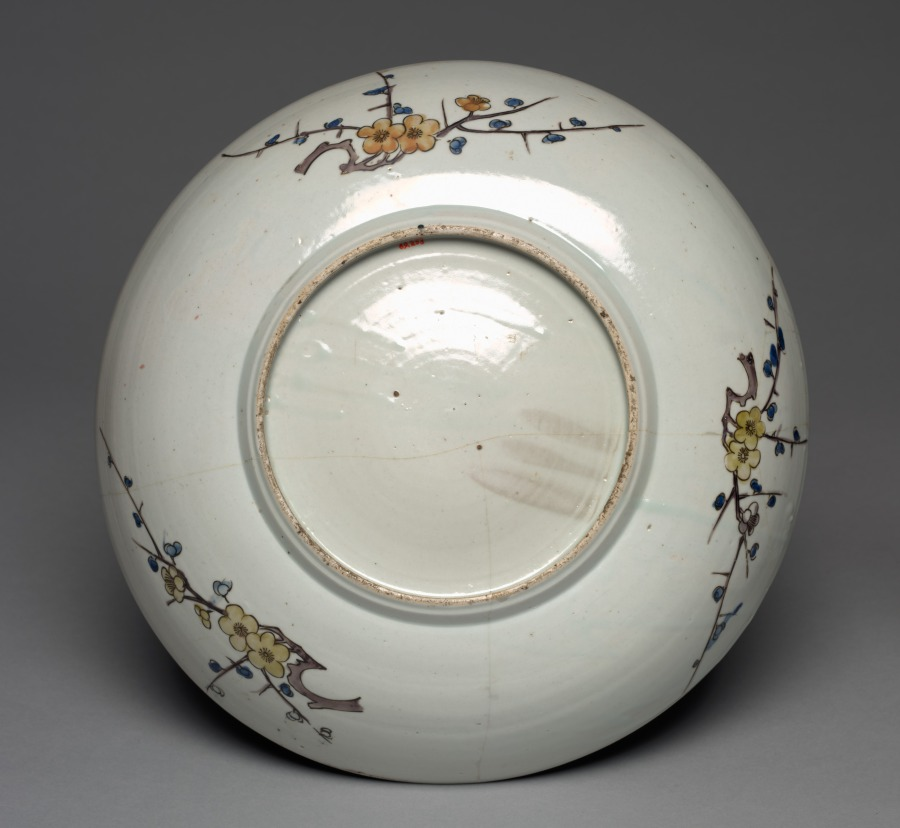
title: Plate with Bird and Flower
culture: Japan, Meiji period (1868–1912) or Taishō period (1912–26)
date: early 1900s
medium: Porcelain with overglaze enamel (Ko-Kutani revival style)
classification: Ceramic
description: This dish is a sophisticated example of later ceramists reinterpreting earlier styles of Japanese porcelain. The colors and patterns used look similar to some works produced on the island of Kyushu in the1600s and 1700s. However, the idea to combine alternating blocks of yellow, green, purple, and blue with a "Chinese grasses" (karakusa) pattern around the rim of the dish is one hit upon in the early 1900s by an artist familiar with the colors and patterns of earlier works.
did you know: Porcelain must be fired at a high temperature to achieve its strength and semitranslucent surface.